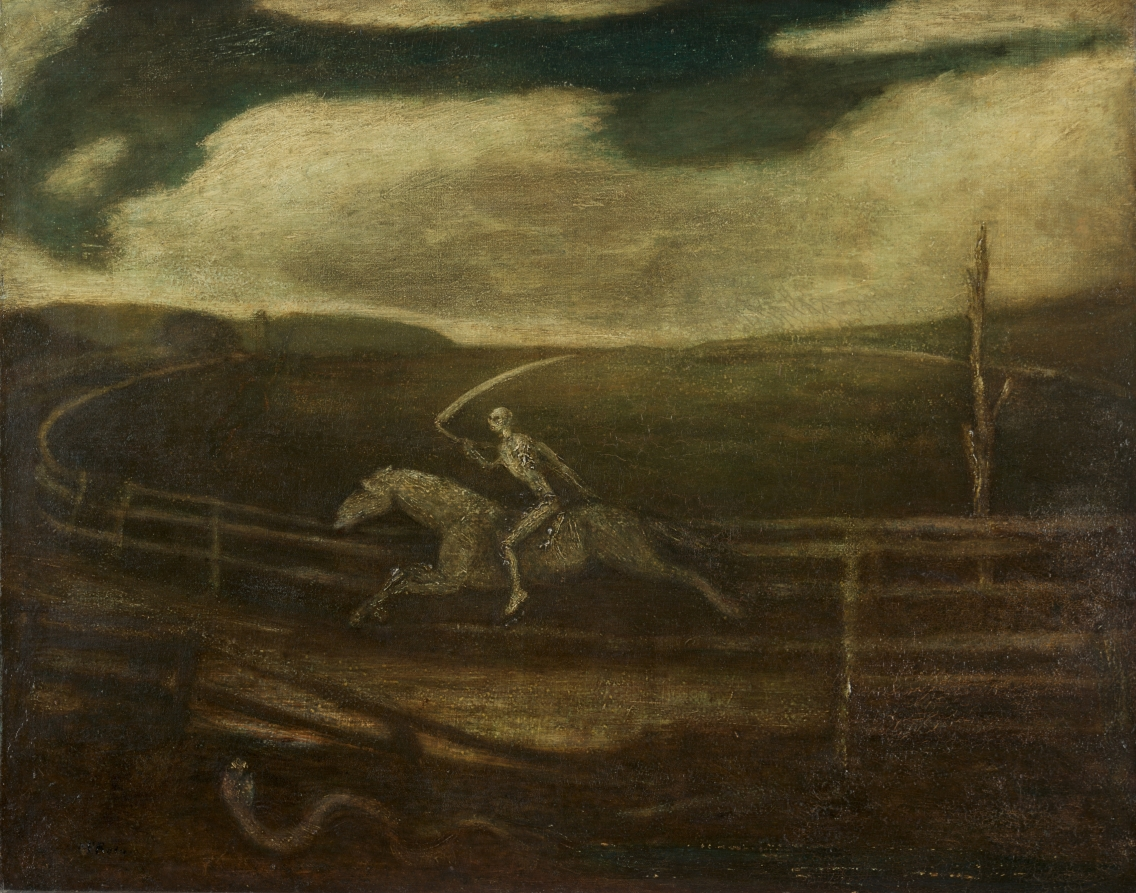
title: The Race Track (Death on a Pale Horse)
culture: America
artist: Albert Pinkham Ryder (American, 1847–1917)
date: c. 1896–1908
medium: oil on canvas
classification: Painting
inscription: Signed lower left: "A. P. Ryder"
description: Ryder’s subject was inspired by a horse race that took place in New York during 1888. One of the artist’s friends wagered $500 on the race and then died by suicide after the horse lost. Medieval symbolism infuses the composition: death appears as a skeleton on horseback holding a scythe with which he cuts down the living, while a snake—a sign of temptation and evil—slithers in the foreground. An intense man, Ryder worked on the painting for several years and was deeply reluctant to part with it.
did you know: Counterclockwise horse racing in the United States was not standardized until the 1920s.